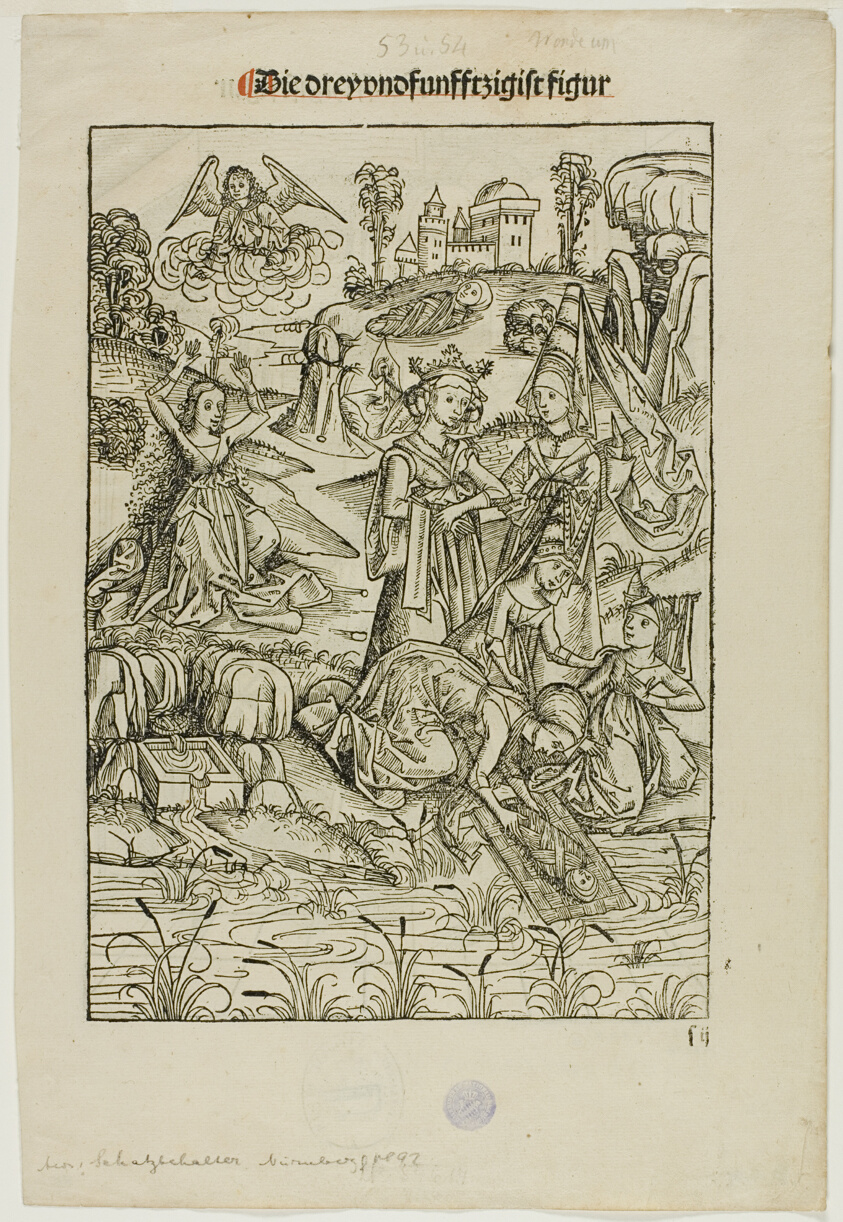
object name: Print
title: Moses Found by Pharaoh's Daughter (recto) and Judas's Betrayal (verso), pages 53 and 54, from the Treasury (Schatzbehalter)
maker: Michael Wolgemut and Workshop (German, 1434/37–1519); published by Anton Koberger (German, 1440–1513)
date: 1491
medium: Woodcut on cream laid paper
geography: Germany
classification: woodcut; print; prints and drawing